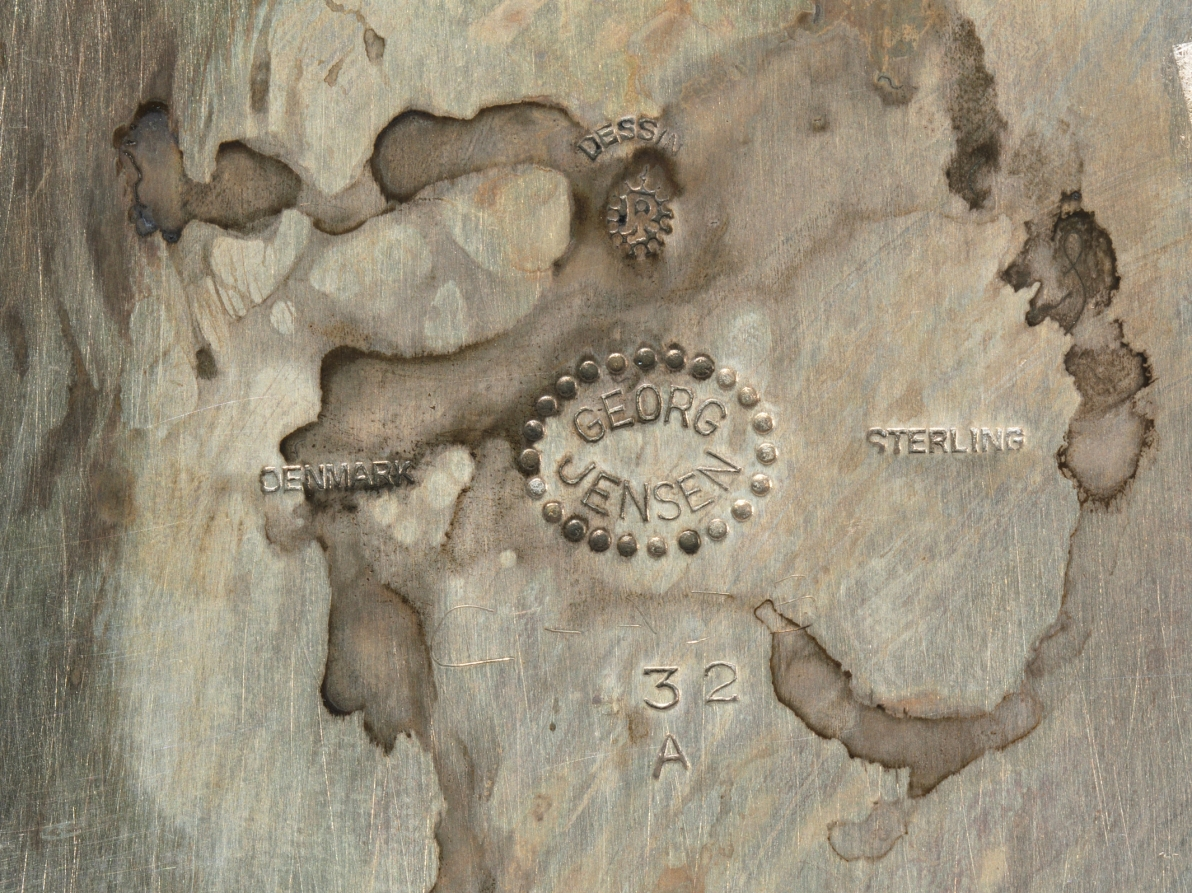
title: Water Pitcher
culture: Denmark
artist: Georg Jensen (Danish, 1866–1935)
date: c. 1950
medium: silver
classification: Silver